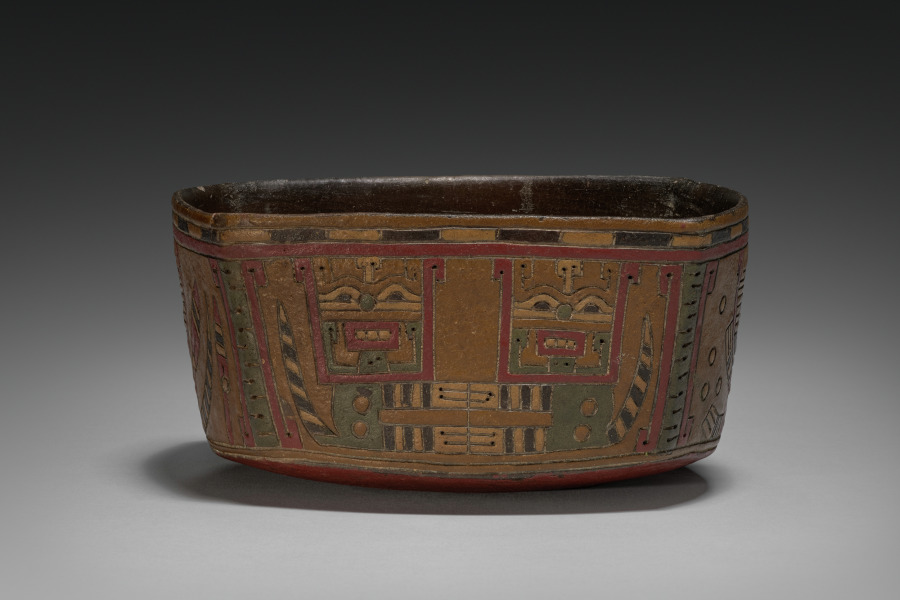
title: Square Bowl with Pampas Cats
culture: Central Andes, South Coast, Paracas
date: 500–400 BCE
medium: Ceramic, post-fire paint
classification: Ceramic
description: The Paracas often decorated their ceramics with geometricized representations of the native Pampas cat, a small, reclusive, wild feline that lives on the margins of agricultural fields, where it preys on the rodents and other pests that are a farmer’s bane. Thus, the ancients seem to have linked it to nature’s fertility and, by extension, human prosperity and continuity.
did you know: The animal shown on this bowl is the Pampas cat, a small, wild feline.